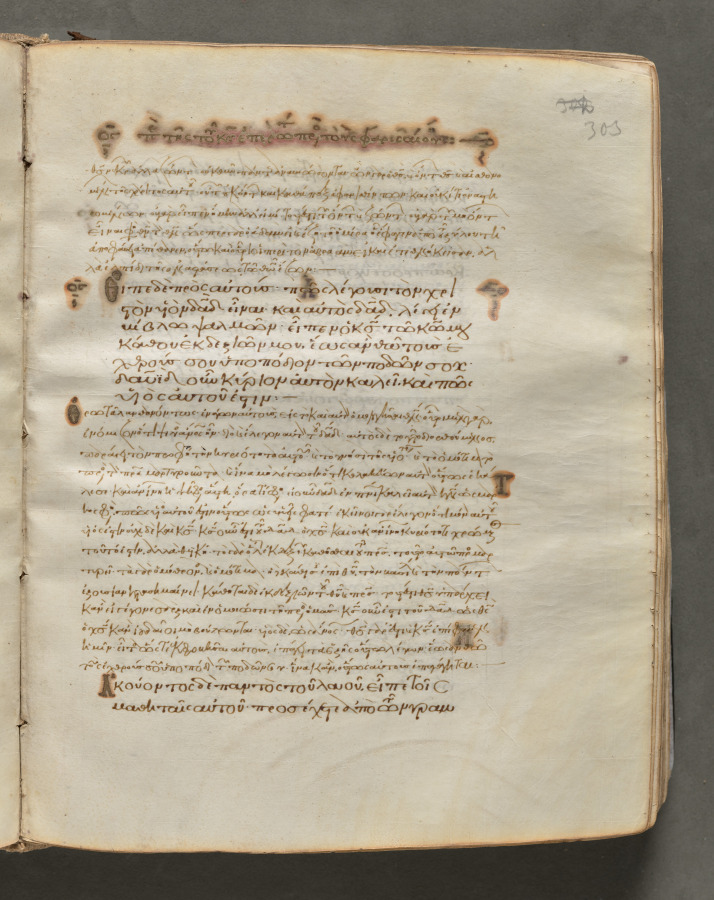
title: Text, folio 303 (recto), from a Gospel Book with Commentaries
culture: Byzantium, Constantinople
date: c. 1000–1100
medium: ink, tempera, and gold on vellum; leather binding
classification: Bound Volume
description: Each of the four gospels in this book opens on a page with brilliantly illuminated borders depicting the author of the text as well as birds—principally peacocks, symbols of the immortality of the soul—and fountains, representing the fountain of life and the salvation of the soul. This volume consists of 428 leaves with texts in Greek. Its level of sophistication suggests that it was probably written and decorated in a monastery in Constantinople.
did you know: Gospel books were carried in procession through Byzantine churches.